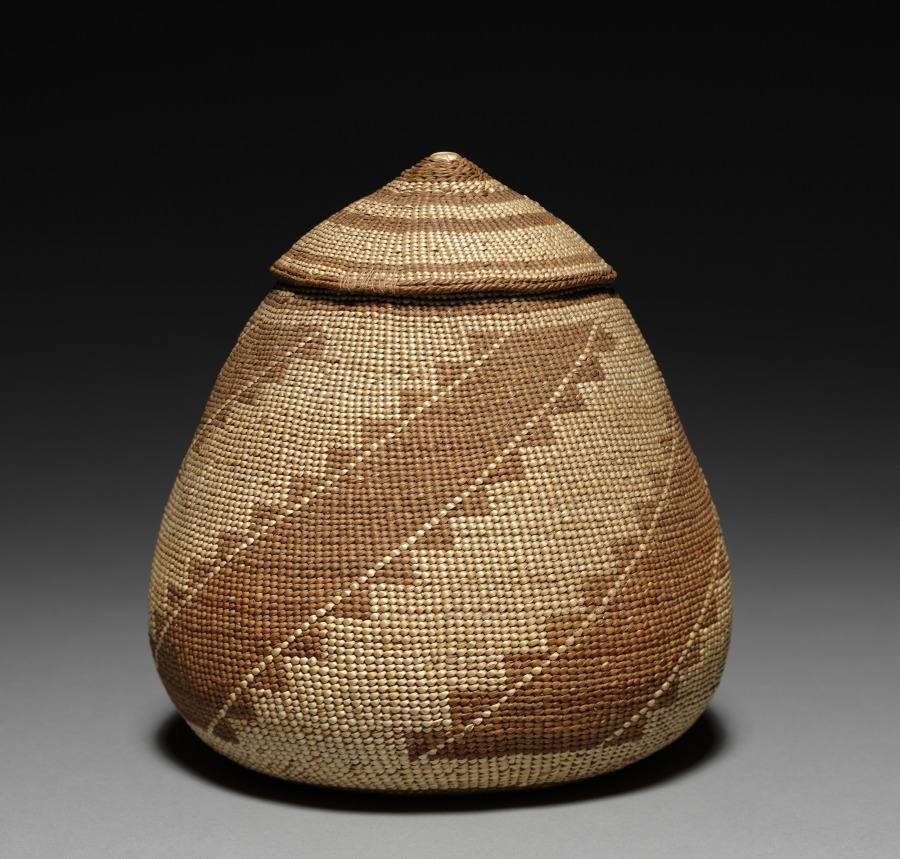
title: Tobacco Basket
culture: California, Yurok, late 19th century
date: c 1875– 1900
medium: twined grasses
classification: Basketry